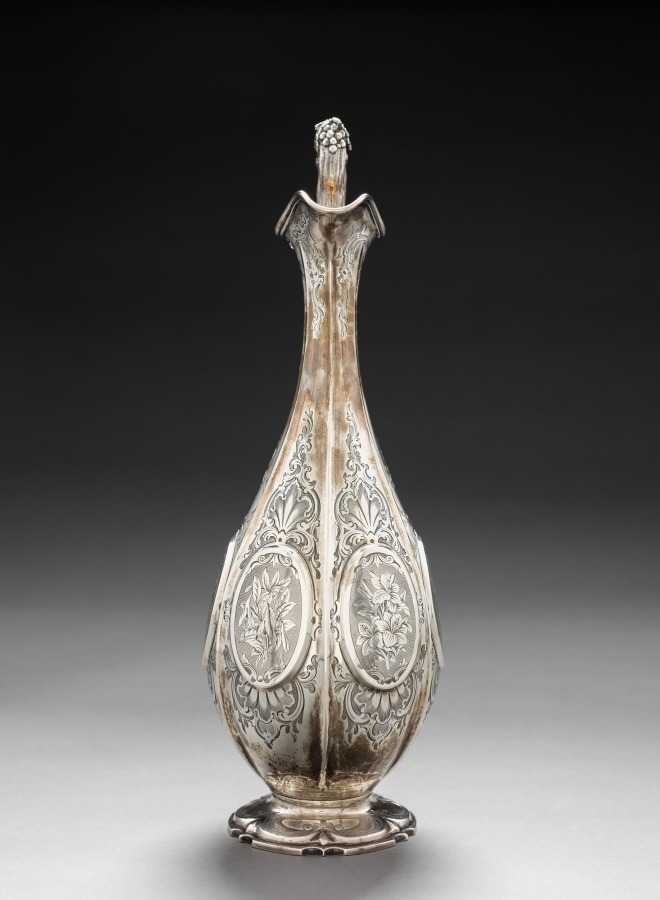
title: Pitcher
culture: England, 19th century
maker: Edward Barnard & Sons (British, c. 1680–2003)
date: c. 1870–80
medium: silver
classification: Silver